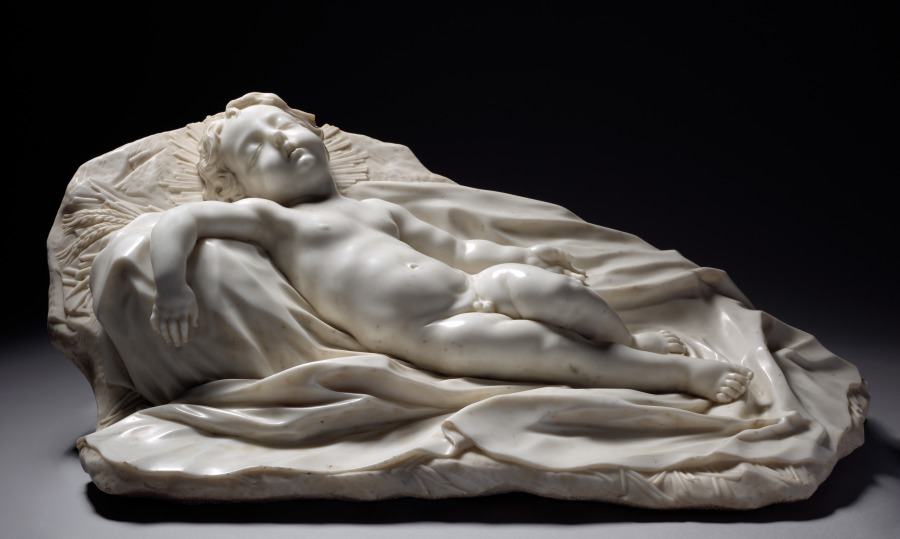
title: Sleeping Christ Child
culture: Italy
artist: Filippo Parodi (Italian, 1630–1702)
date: c. 1675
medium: marble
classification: Sculpture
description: Christ—no longer an infant, but a young child—sprawls on a bed of straw, his head thrown back in slumber and his right arm dangling. The simple radiance framing his head indicates his divinity. Representations of the sleeping Christ child were enduringly popular, not only because of the subject’s inherent charm, but sleep, as a metaphor for death, encouraged pious Christians to meditate on Christ’s humanity and his eventual suffering and death. Filippo Parodi’s Sleeping Christ Child beguiles with lifelike detail. Parodi used varying degrees of polish to differentiate surface textures: Christ’s body is burnished to a soft gleam, while his hair and the straw are more roughly carved, absorbing rather than reflecting the light. Parodi exploited the sensuous and tactile possibilities of the marble to enhance the emotional impact of his piece, a tactic learned from the master of Italian Baroque sculpture, Gianlorenzo Bernini.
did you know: Tender images of the Christ child sleeping encouraged devout Christians to meditate on Christ’s humanity.